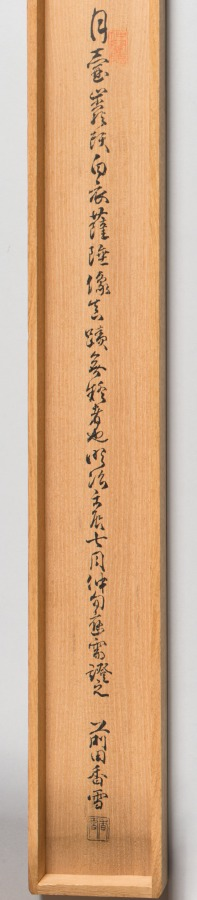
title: White-Robed Guanyin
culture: China, Southern Song dynasty (1127-1279)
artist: attributed to Zhang Yuehu (Chinese, active 1200s)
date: late 1200s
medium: Hanging scroll; ink on paper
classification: Painting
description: The figure here sits on a rocky elevation representing Potalaka in the Southern Sea, Avalokitesvara’s island home. A vase with a bamboo sprig holds pure water, the nectar of life. Bamboo shines through the figure’s halo, a way of seeing the illusionary world through the Buddhist truth. Avalokitesvara (Guanyin in Chinese), the bodhisattva of compassion, was integrated into the Chan Buddhist canon of venerated beings. In this context, the bodhisattva is often depicted in its female manifestation as the White-Robed Guanyin. The worship of the feminine White-Robed Guanyin has its origins on Mount Tianzhu in Hangzhou, where Qian Liu (852–932), ruler of the Wuyue kingdom, established the Upper Tianzhu Monastery to venerate her image.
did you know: As an artist, Zhang Yuehu was better known in Japan than in his own country.